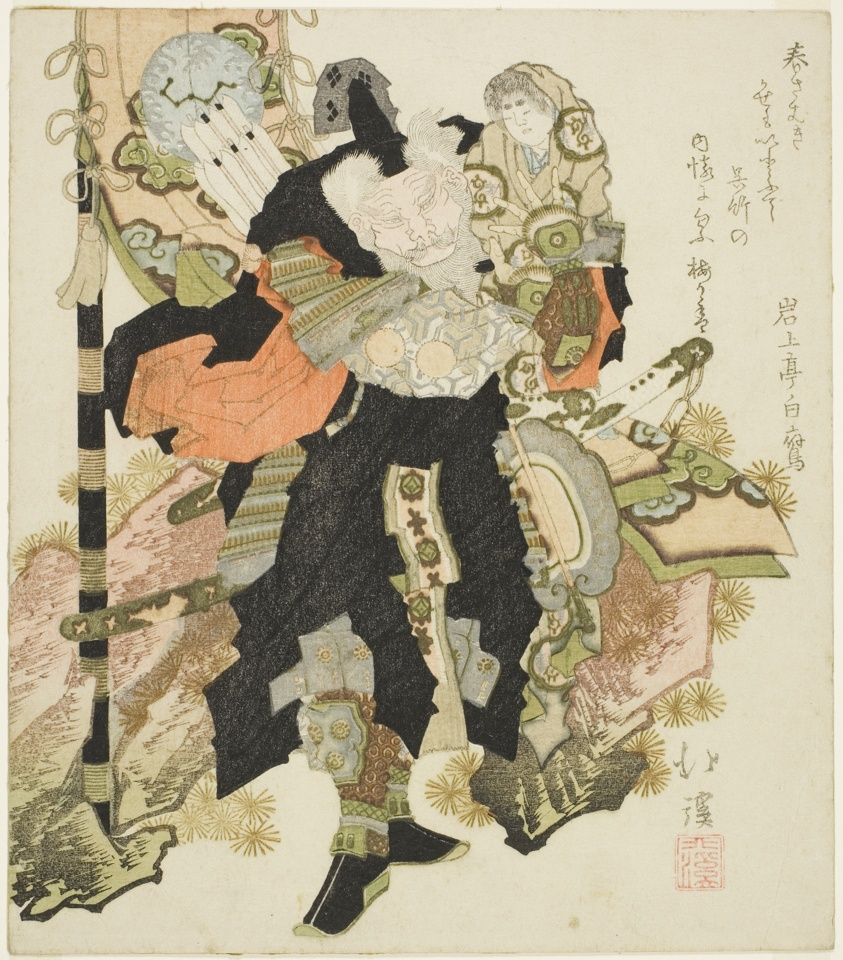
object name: Print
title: Takenouchi no Sukune carrying the Emperor Ojin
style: Japanese (culture or style)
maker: Totoya Hokkei (Japanese, 1780-1850)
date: c. 1830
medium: Color woodblock print; shikishiban, surimono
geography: Japan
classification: woodblock print; print; asian art